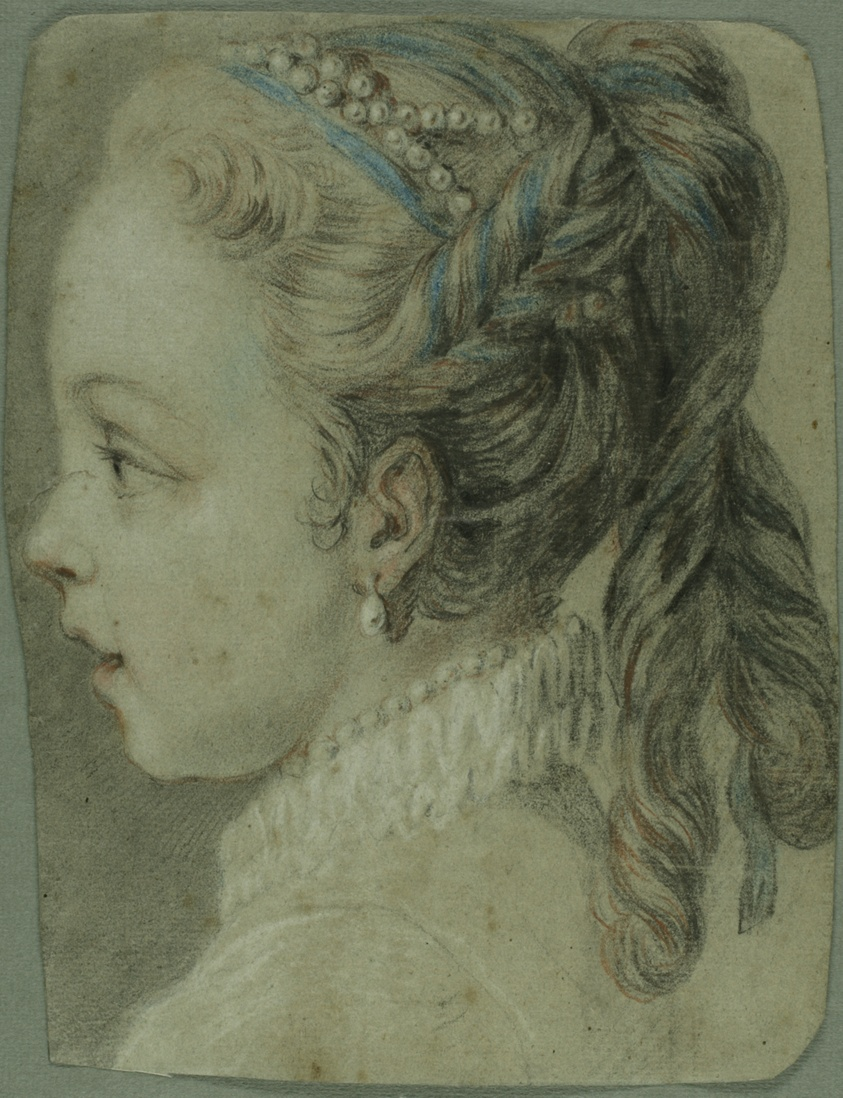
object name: Drawing and Watercolor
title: Study: Head of a Young Girl Facing to the Left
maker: Carle van Loo (French, 1705-1765)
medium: Pastel, with touches of black crayon and red chalk, on blue laid paper, laid down on blue wove paper, laid down on cream wove paper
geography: France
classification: pastel; drawings (visual works); prints and drawing